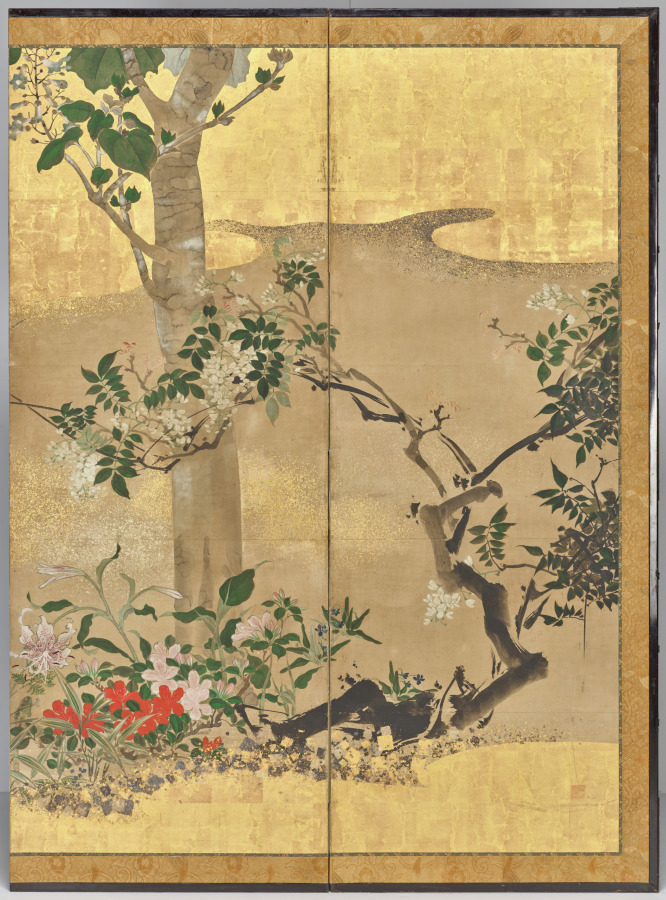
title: Flowers and Trees of the Four Seasons (right screen)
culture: Japan, Edo period (1615–1868)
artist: Watanabe Shikō (Japanese, 1683–1755)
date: early to mid-1700s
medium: Six-panel folding screen; ink, color, gold, silver, and gilding on paper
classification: Painting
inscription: 始興之印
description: The painter Watanabe Shikō had a special interest in scientific realism, based on interactions with his patron Konoe Iehiro. Shikō combined his attention to accurate depiction of plants with strong ink outlines and decorative elements like gold and silver, arriving at an innovative style that influenced many of his peers in the city of Kyoto.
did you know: One plant in these screens, tumeric, or ukon in Japanese, is found in Okinawa.